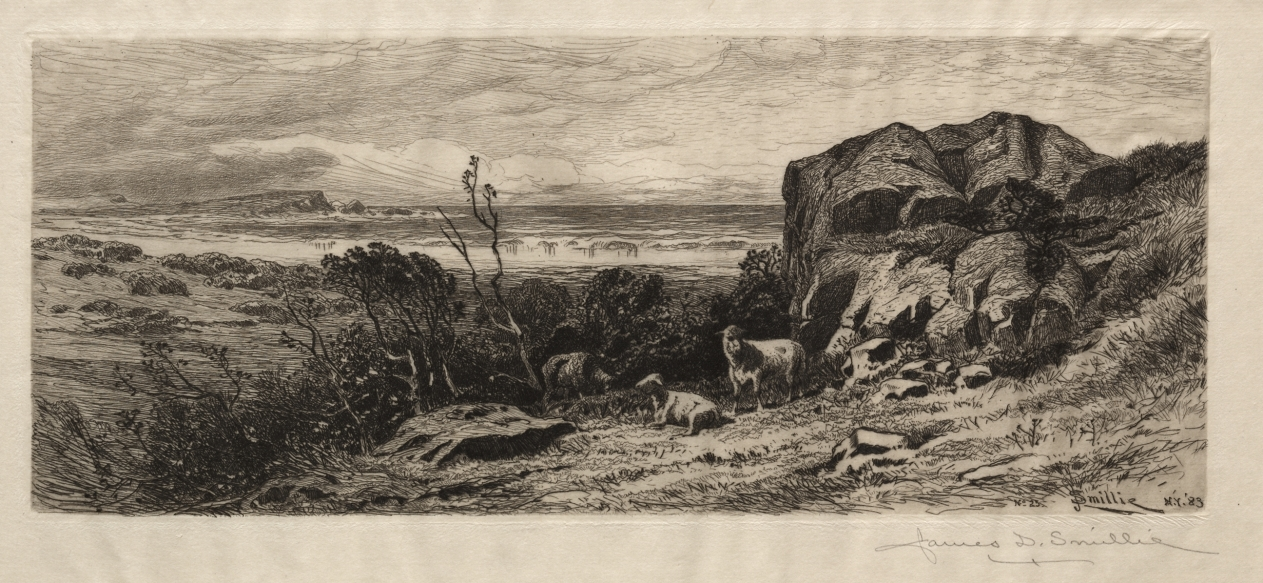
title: At Marblehead Neck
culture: America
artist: James David Smillie (American, 1833–1909)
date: 1883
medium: etching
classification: Print